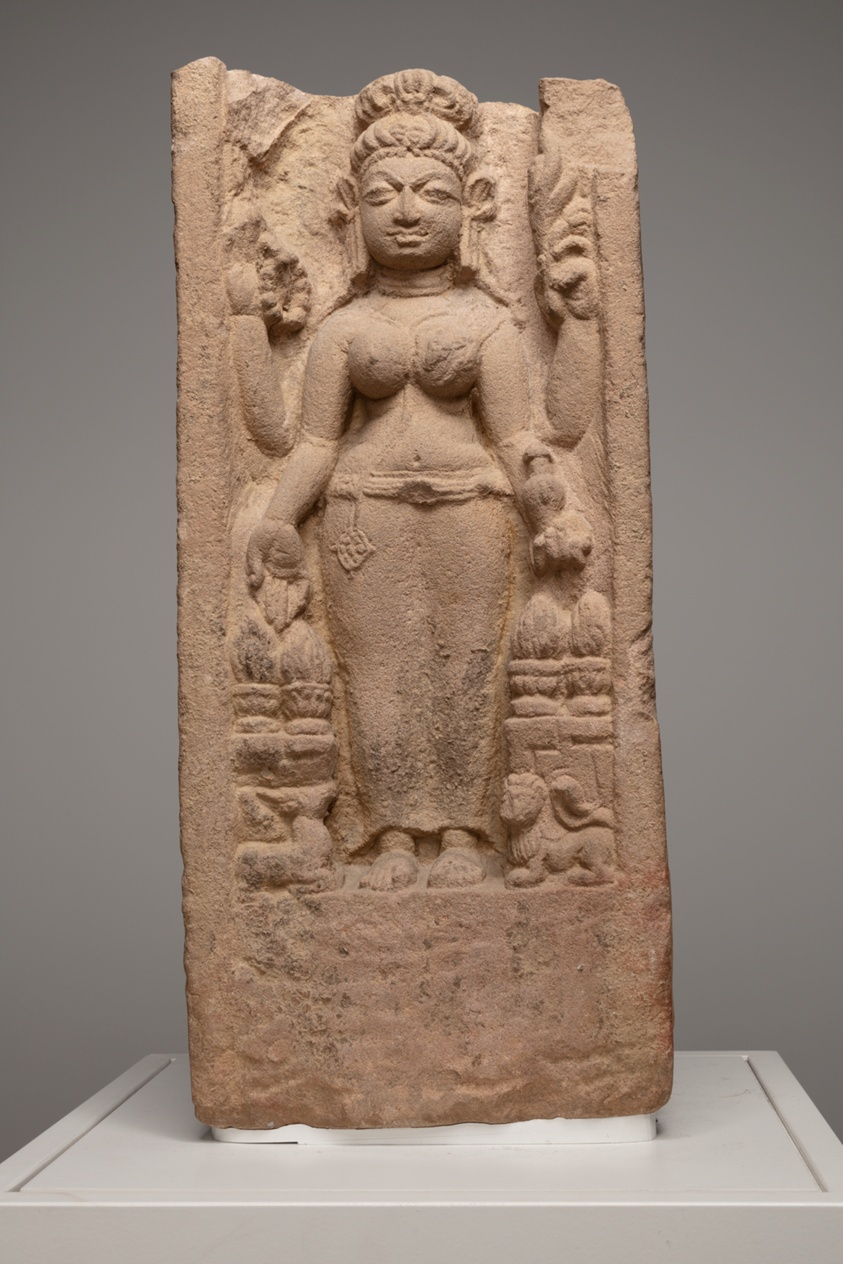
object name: Architectural fragment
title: Pillar Fragment with Gods Shiva and Ganesha and Goddesses Parvati and Durga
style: South Asian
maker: India; Madhya Pradesh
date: 8th/9th century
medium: Sandstone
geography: Madhya Pradesh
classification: stone; architectural fragment; asian art